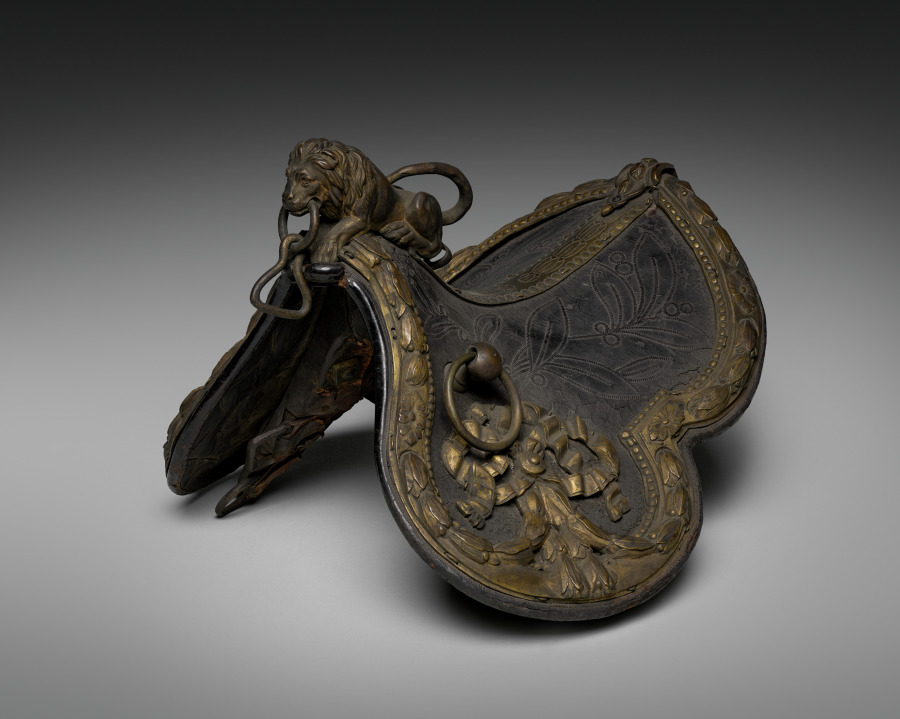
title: Child's Harness Saddle with Lion Pommel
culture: France, 17th century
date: 1600s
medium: leather, tooled with wood, canvas and steel on a brass frame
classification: Arms and Armor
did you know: This child-sized harness saddle was said to have been used in a riding school.